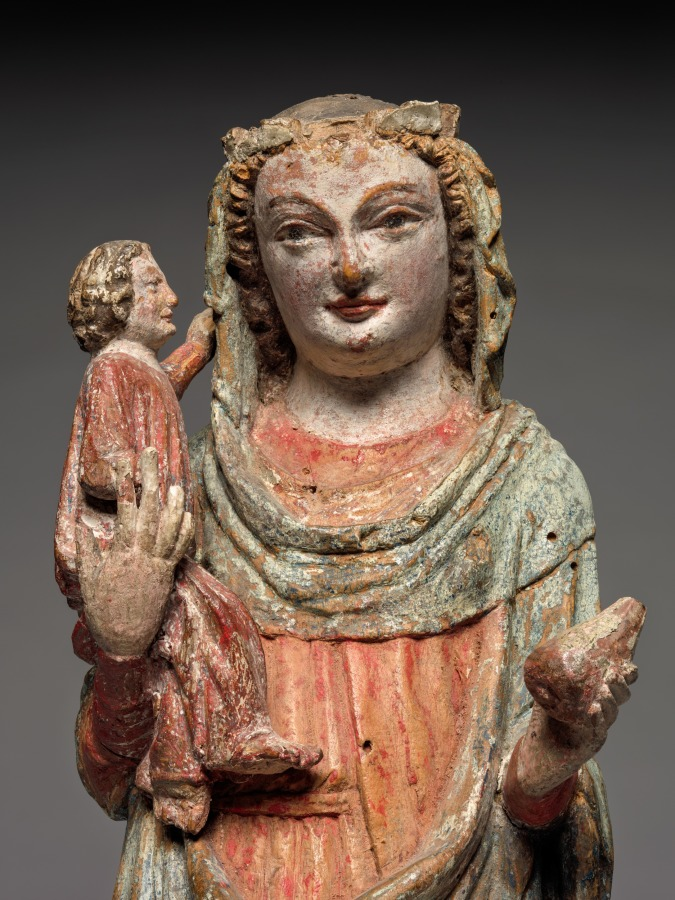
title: Reliquary Statuette of the Virgin and Child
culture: Austria, Salzburg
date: c. 1330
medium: painted lindenwood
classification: Sculpture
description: A small rectangular cavity in the back of this sculpture reveals that it was originally made to serve as a reliquary (a container for relics). In her left hand the Virgin holds a pear, a symbol of the peace and love of Christ.